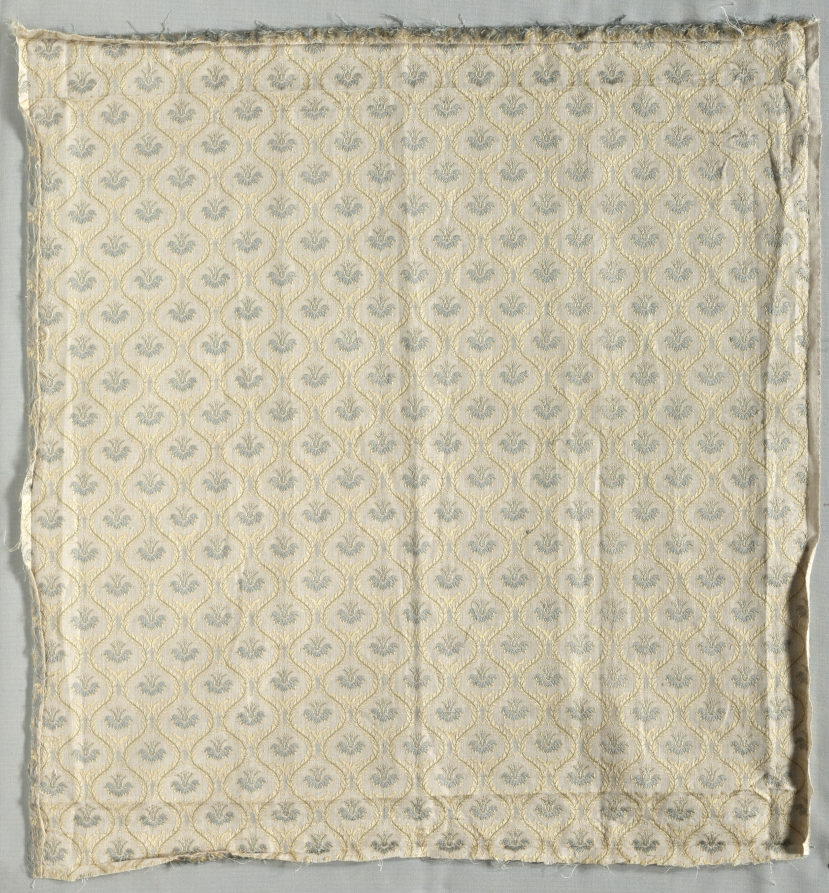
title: Length of Silk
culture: Italy, early 20th century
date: early 1900s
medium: lampas weave, silk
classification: Textile